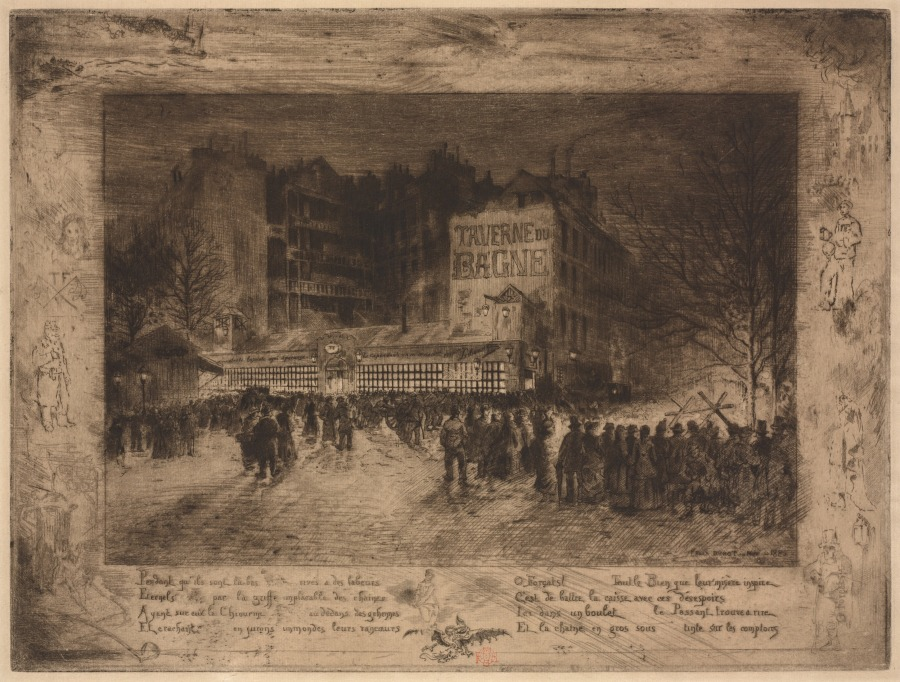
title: La Place des Martyrs et la Taverne du Bagne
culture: France, 19th century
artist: Félix Hilaire Buhot (French, 1847–1898)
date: 1885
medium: etching, aquatint, roulette, drypoint, and burnishing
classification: Print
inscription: lower center, in red: Buhot stamp FB owl (Lugt )